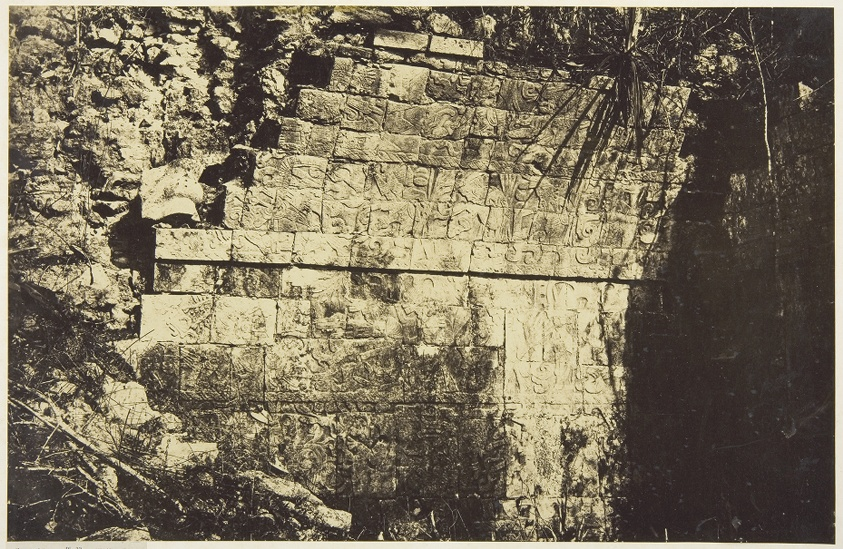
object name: Photograph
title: Palais Du Cirque à Chichen-Itza, Intérieur d'une salle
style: 19th century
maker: Désiré Charnay (French, 1828–1915)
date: 1859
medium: Albumen silver print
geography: France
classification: albumen silver print; photographic process; photography; photograph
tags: writing, photography, travel